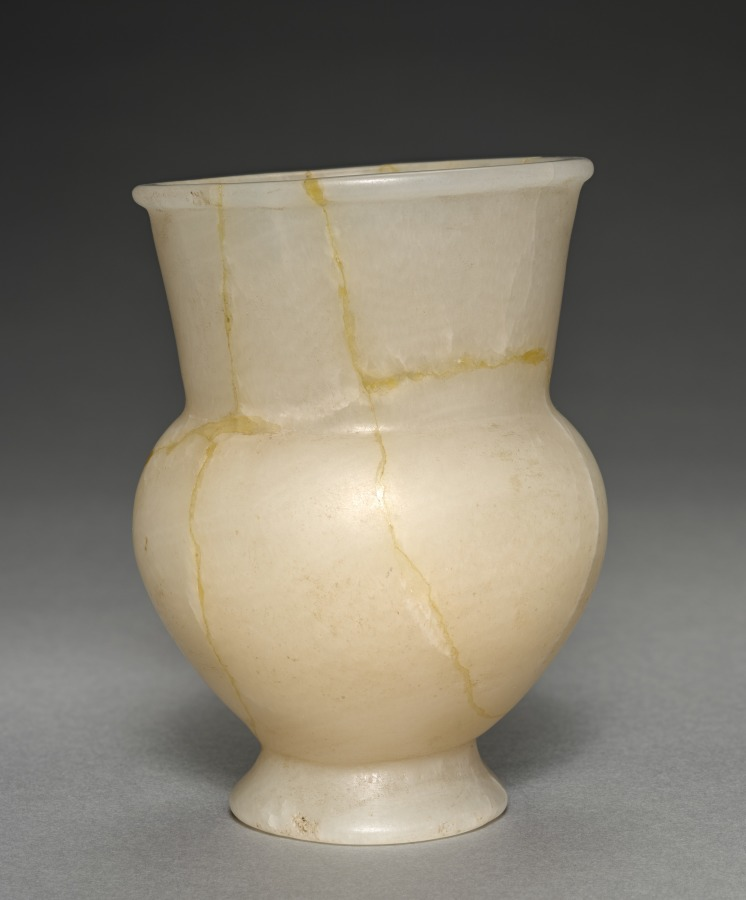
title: Long-Necked Flask (Krateriskos)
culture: Egypt, New Kingdom (1540–1069 BCE), Dynasty 18, reign of Tuthmosis III (1479–1425 BCE)–reign of Amenhotep III (1390–1352 BCE)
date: 1540–1296 BCE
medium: travertine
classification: Vessels